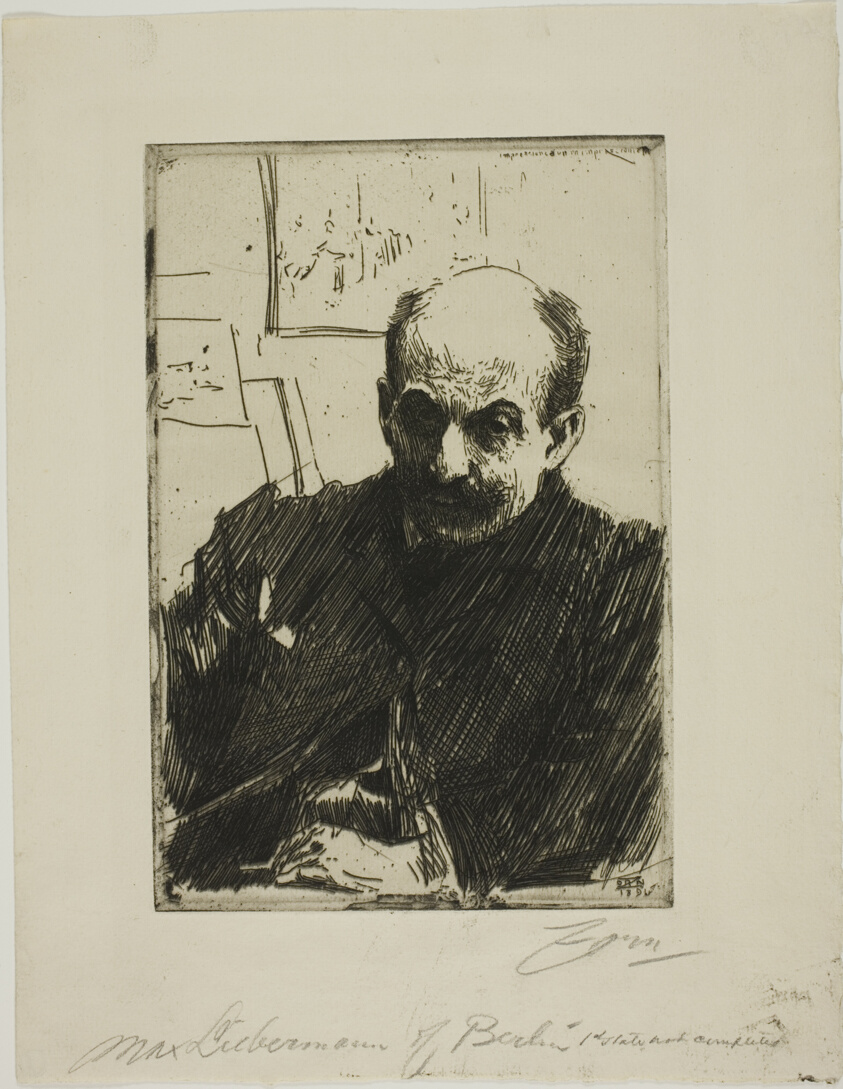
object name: Print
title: Max Liebermann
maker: Anders Zorn (Swedish, 1860-1920)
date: 1891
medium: Etching on ivory laid paper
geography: Sweden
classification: etching; print; prints and drawing